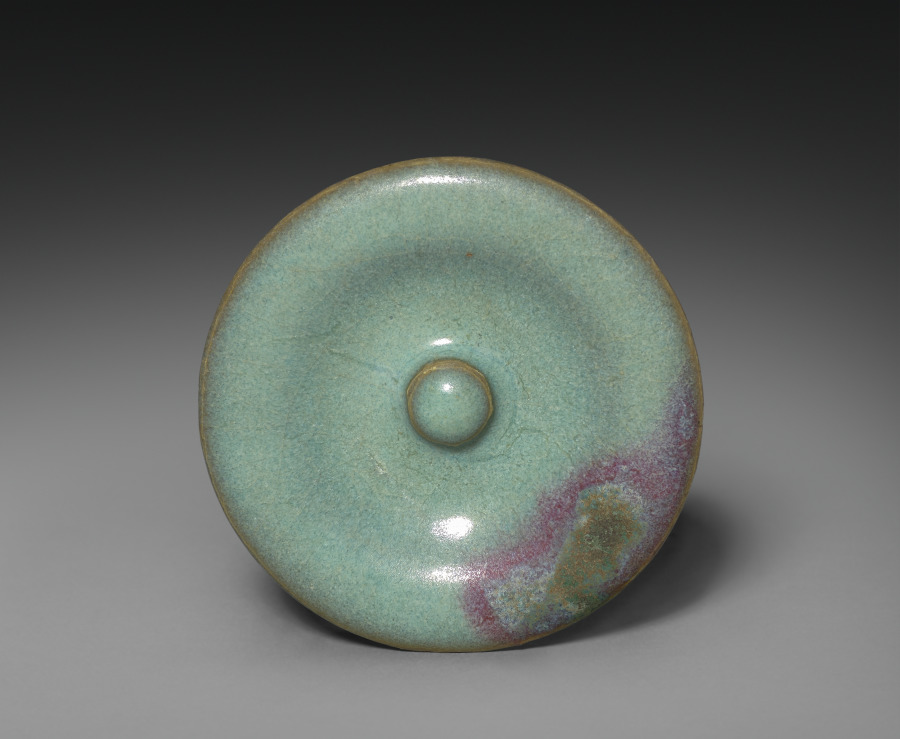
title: Jar with Cover (cover)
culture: China, Henan province, Yuxian, Northern Song dynasty (960-1127) or Jin dynasty (1115-1234)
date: 1100s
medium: porcelaneous stoneware with blue glaze and splashes of purple, Jun ware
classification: Ceramic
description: The beauty of Jun ware lies in its spectacular glaze effects, which provide immediate visual appeal. The glaze that is thickly applied onto the heavily potted body also lends the vessel a sense of volume. As shown here, its glaze colors range from soft milky-blue to rose-purple. The purple suffusions are created by splashing or brushing copper-rich pigments onto the glaze before firing. The merging of purple splashes with opalescent blue glaze displays rich tonal variations, resembling purplish glows at sunset.